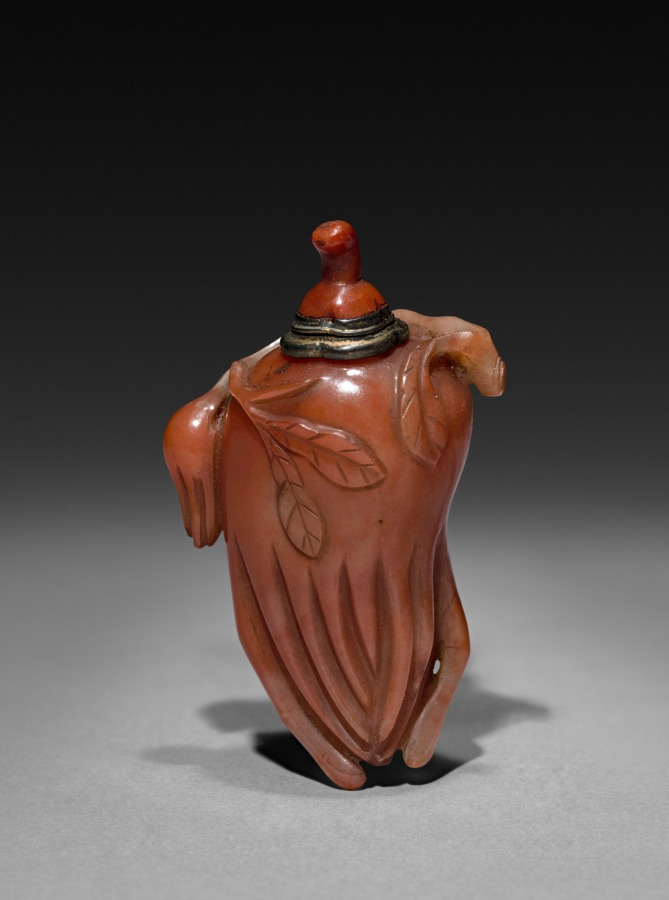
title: Snuff Bottle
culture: China, Qing dynasty (1644-1911)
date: 1644–1911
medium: glass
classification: Glass